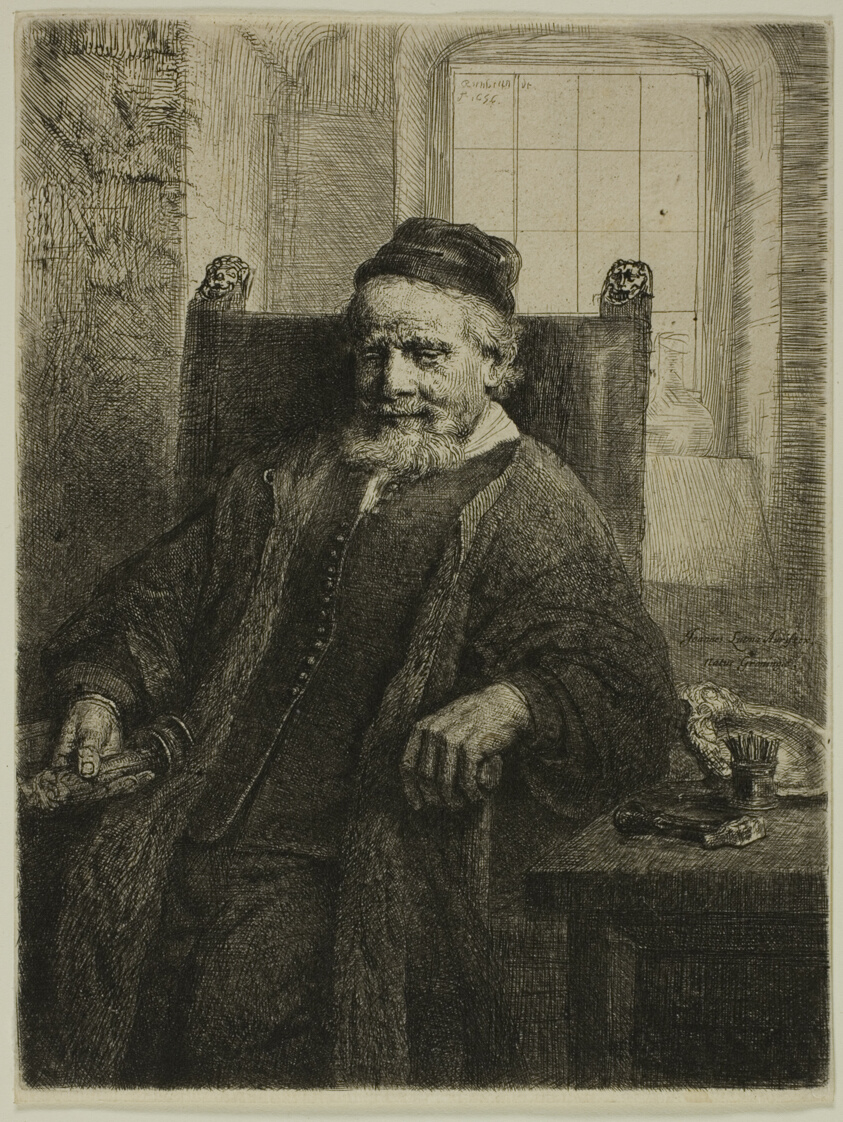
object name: Print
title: Jan Lutma, Goldsmith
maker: Rembrandt van Rijn (Dutch, 1606-1669)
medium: Etching on paper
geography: Holland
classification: etching; print; prints and drawing; paper